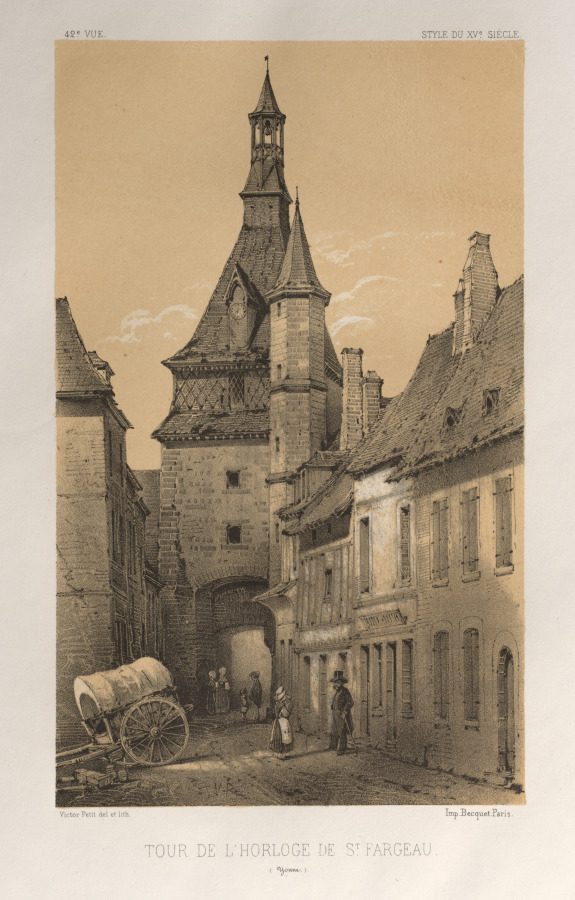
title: Architecture Pittoresque ou Monuments des xveme. Et xvieme. Siecles: Chateaux De France des XV et XVI Siecles: Pl. 42, Tour De L'Horloge De St. Fargeau (Yonne)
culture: France, 19th century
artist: Victor Petit (French, 1817–1874)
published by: Charles Boivin (publisher and editor); Lith de Godard a Paris (printer)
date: 1860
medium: lithograph with tint stone, from portfolio of 100 lithographs with tint stone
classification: Print